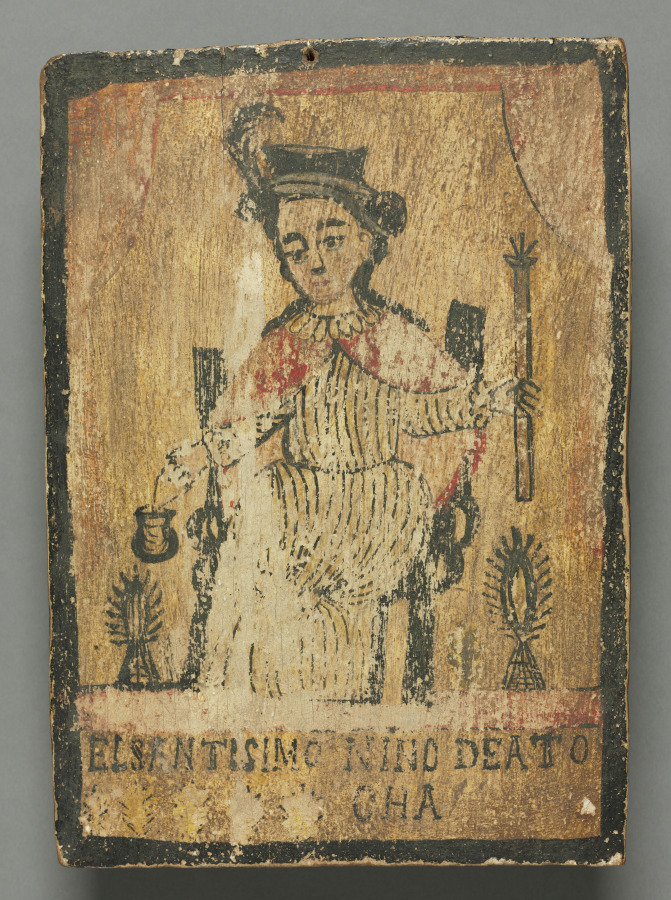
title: El Santo Nino de Atocha: santo de retablo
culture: America, New Mexico, 17th-18th century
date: 1600s-1700s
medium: oil on wood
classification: Painting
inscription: Lettering in black at bottom of panel above black border: "EL SENTISIMO NINI DE ATOCHA"